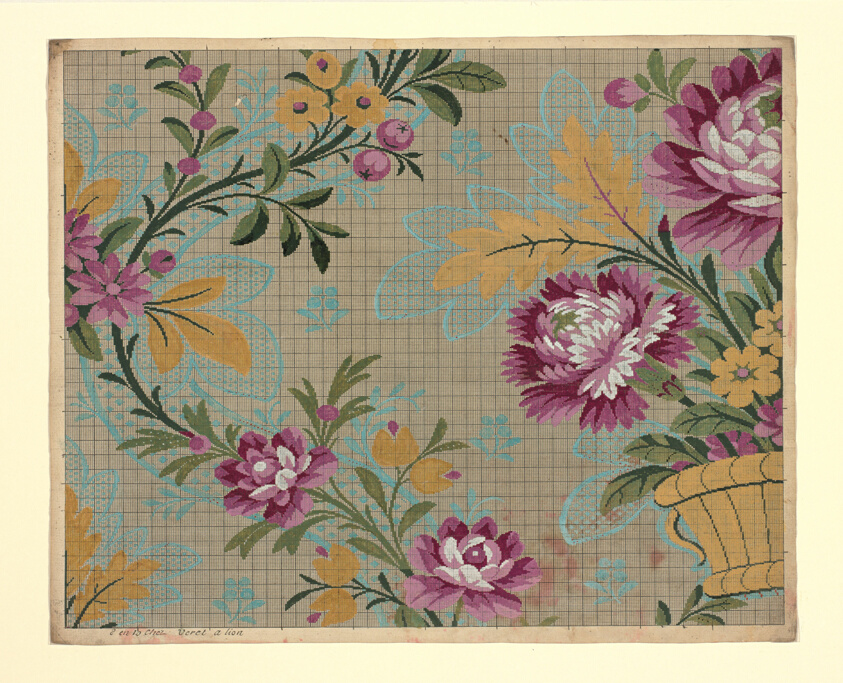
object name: Drawing and Watercolor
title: Mise-en-carte (Point-paper)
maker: Designed by Germain Frères; France, Lyon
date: 1760/90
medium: Ink and gouache on hand drawn graph paper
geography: France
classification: textile; accessory - paper design